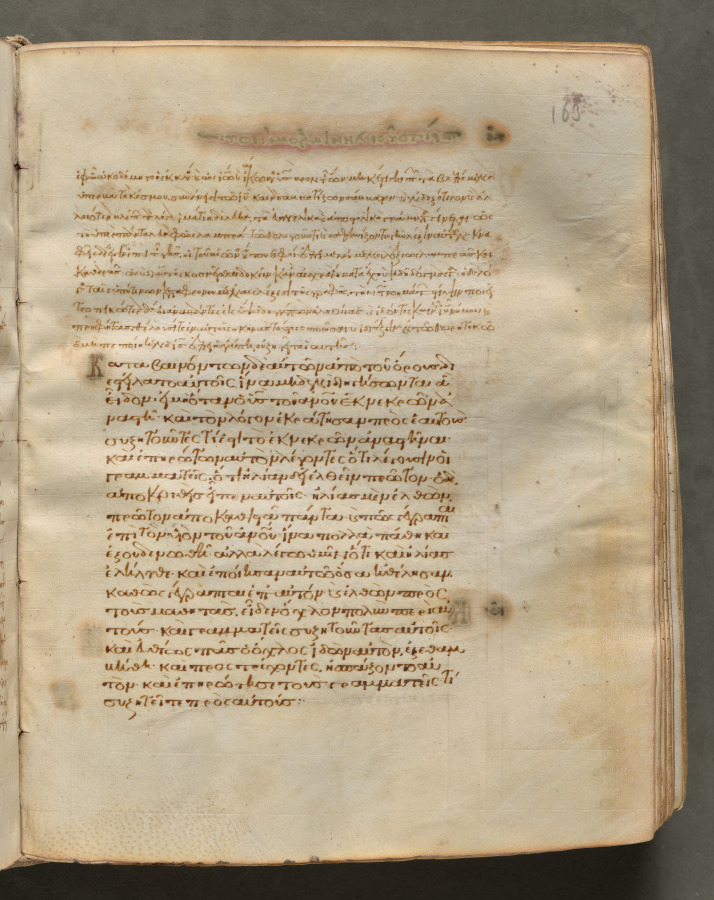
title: Text, folio 163 (recto), from a Gospel Book with Commentaries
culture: Byzantium, Constantinople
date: c. 1000–1100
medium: ink, tempera, and gold on vellum; leather binding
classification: Bound Volume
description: Each of the four gospels in this book opens on a page with brilliantly illuminated borders depicting the author of the text as well as birds-principally peacocks, symbols of the immortality of the soul-and fountains, representing the fountain of life and the salvation of the soul. This volume consists of 428 leaves with texts in Greek. Its level of sophistication suggests that it was probably written and decorated in a monastery in Constantinople.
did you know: Gospel Books were carried in procession through Byzantine churches.